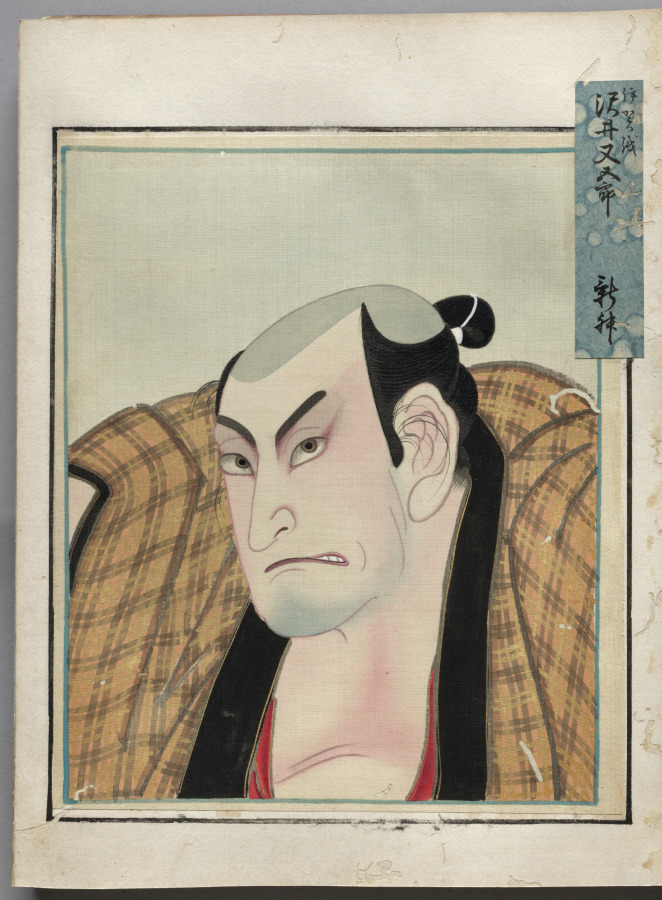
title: Double-Leaf from Album of Actor Portraits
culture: Japan, Edo period (1615–1868)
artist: Shōrakusai (Japanese)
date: c. 1790–1810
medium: double-leaf from an accordion-style album; ink on paper (right) and ink and color on silk (left)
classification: Bound Volume